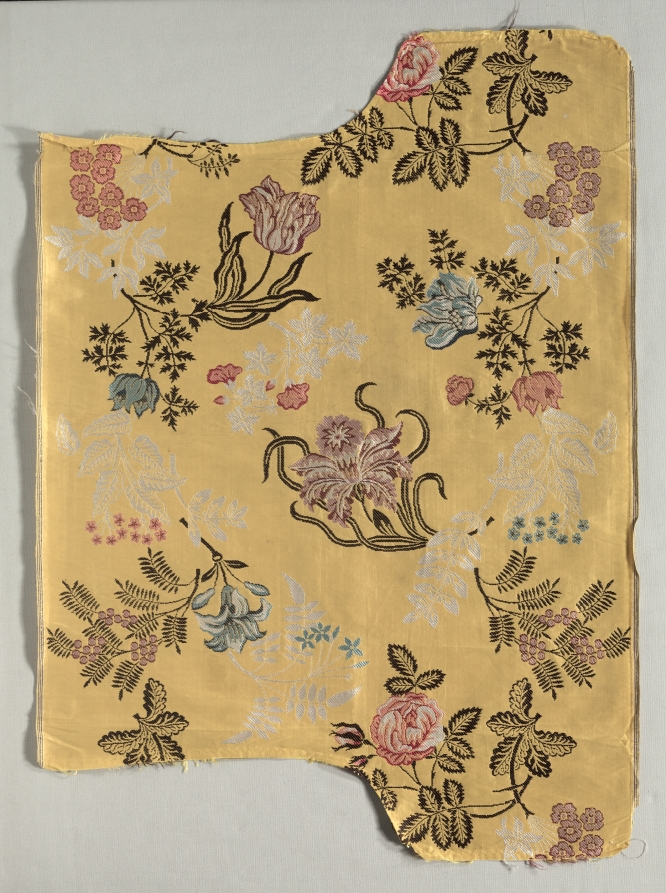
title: Strip of Brocaded Silk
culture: England, Spitalfields, 18th century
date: 1700s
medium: silk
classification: Textile